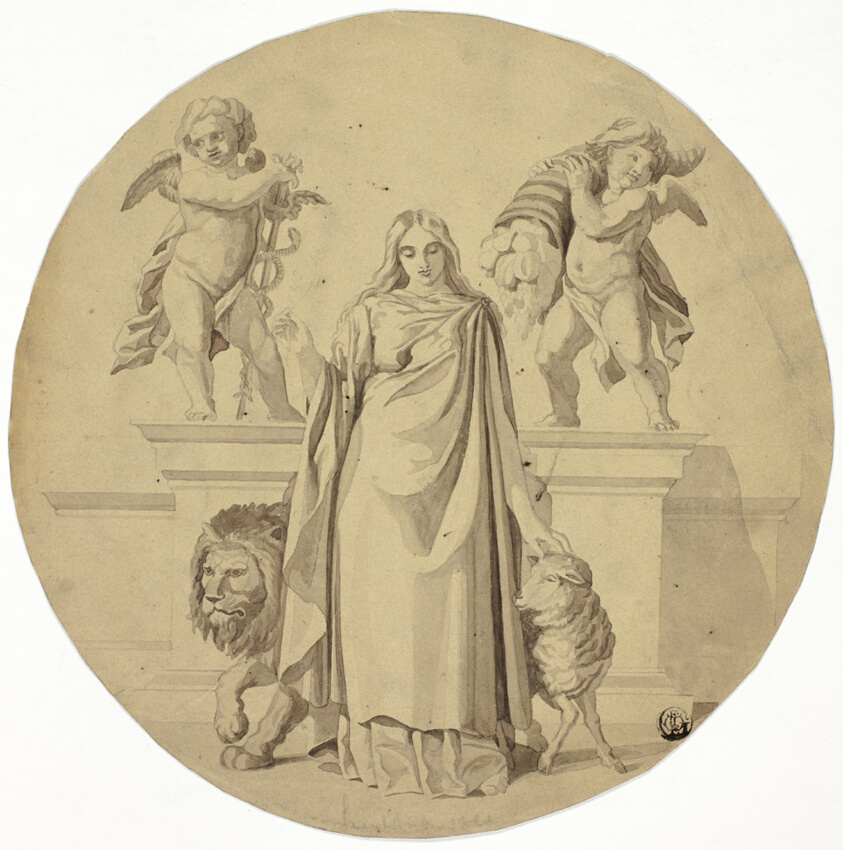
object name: Drawing and Watercolor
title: Allegorical Female Figure with Lion, Lamb, Two Putti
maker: Baron Frederic Leighton; English, 1830-1896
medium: Brush and brown wash, with graphite and traces of brush and reddish-brown wash, on tan wove paper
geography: United Kingdom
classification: ink or chalk wash; drawings (visual works); prints and drawing